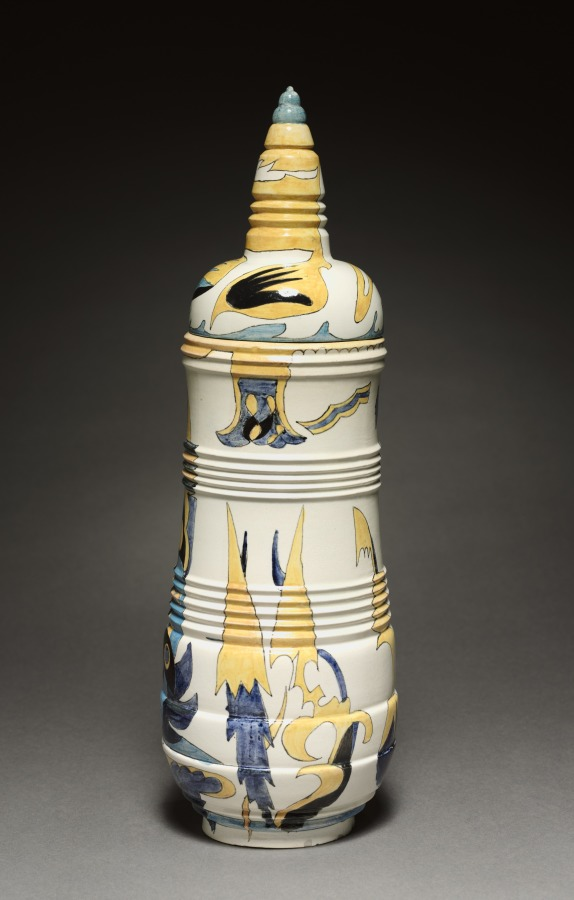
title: Covered Jar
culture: Netherlands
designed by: Theodorus A. C. Colenbrander (Dutch, 1841–1930)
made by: Rozenburg Factory (Netherlandish)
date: 1885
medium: earthenware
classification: Ceramic